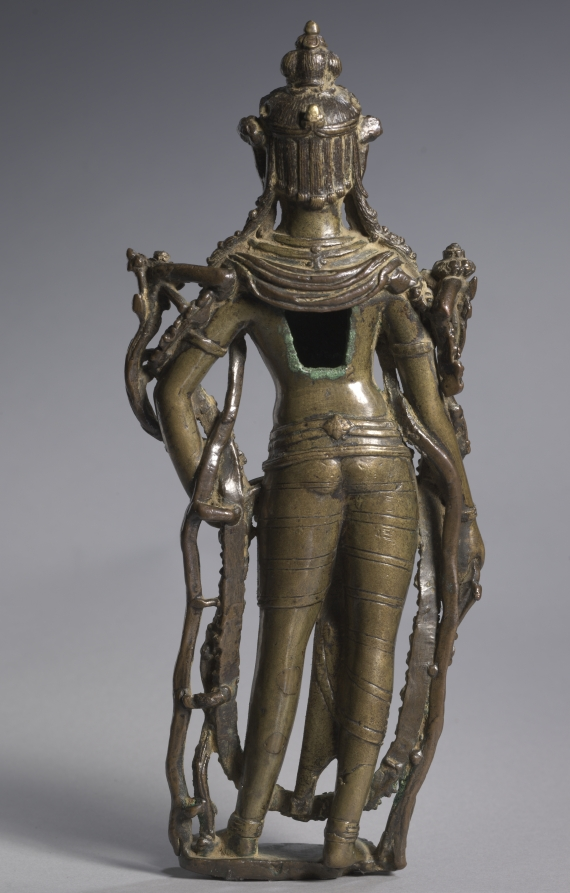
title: Bodhisattva Padmapani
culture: Western Tibet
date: 900s–1000s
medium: brass inlaid with silver and gold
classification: Sculpture